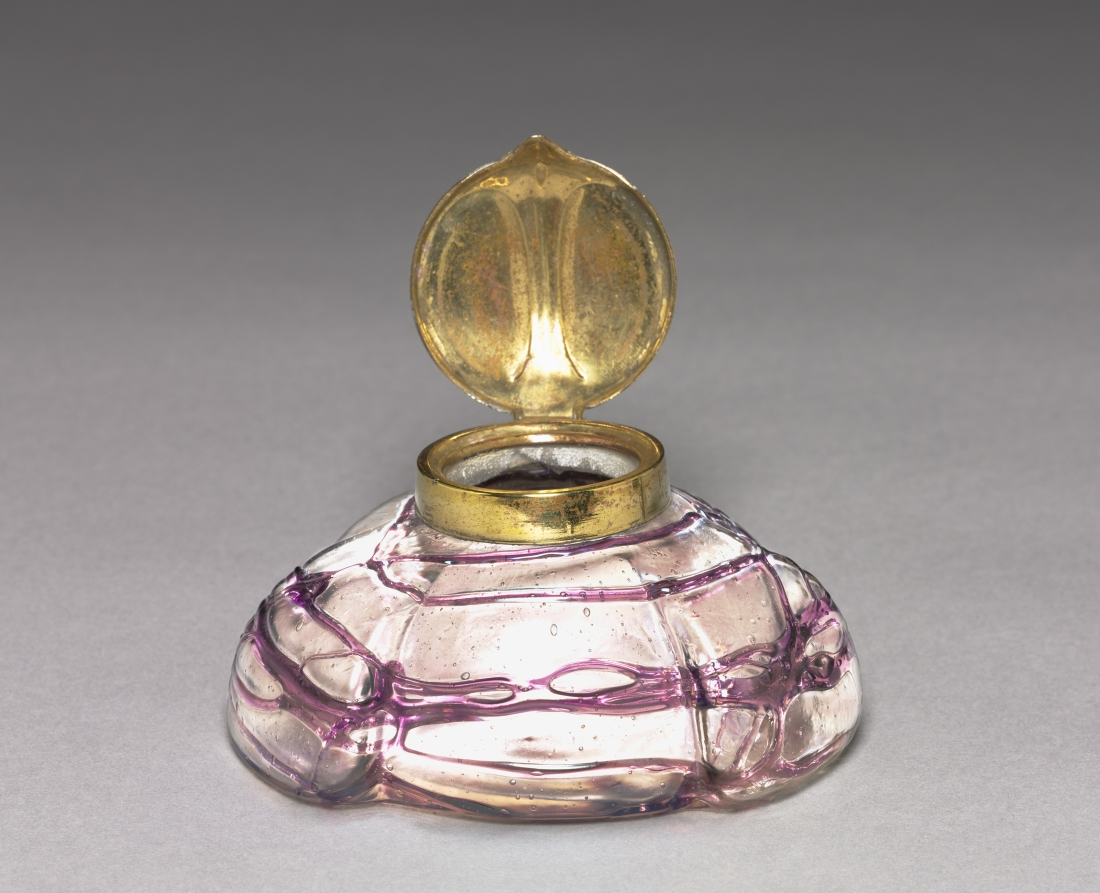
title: Inkwell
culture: Czechoslovakia, late 19th century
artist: Pallme-König & Habel (Czech)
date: c. 1899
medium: glass with bronze mount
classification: Glass